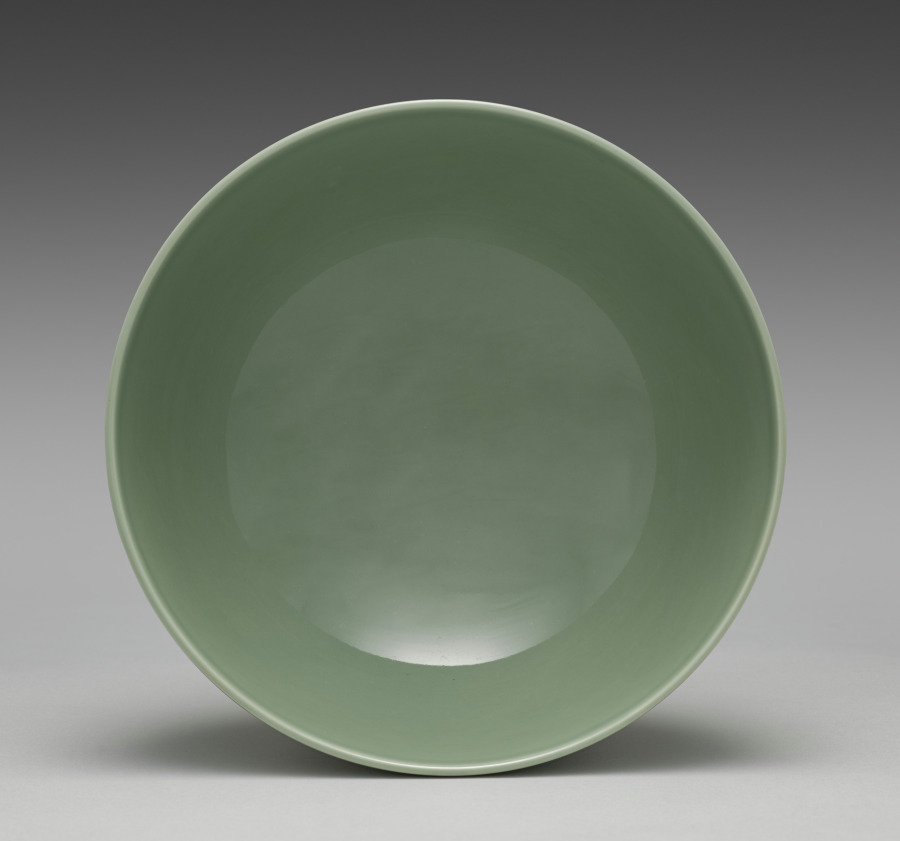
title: Sweets Bowl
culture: Japan, Meiji period (1868–1912)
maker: Seifū Yohei III (Japanese, 1851–1914)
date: 1893–1914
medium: Porcelain with green glaze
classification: Ceramic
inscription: 彫銘：清風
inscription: 共箱の箱書：（蓋裏）秘色窯菓子鉢 三世清風晟山作（印：帝室技藝員）襲（袭）四世清風與平識之（印：清風）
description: The box for this sweets bowl has an attestation by Yohei IV that it is a work by Yohei III and in the hisokuyō (C. mise yao), or “mysterious color ware,” style. In fact, as actual examples of mise ware were unknown in Yohei III’s time, he would have associated the color with the green-glazed ceramics of kilns at Longquan, also in Zhejiang Province, produced during the Yuan dynasty.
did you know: Many ceramics created by the Seifū Studio refer to and emulate Chinese ceramics in form and glazing.